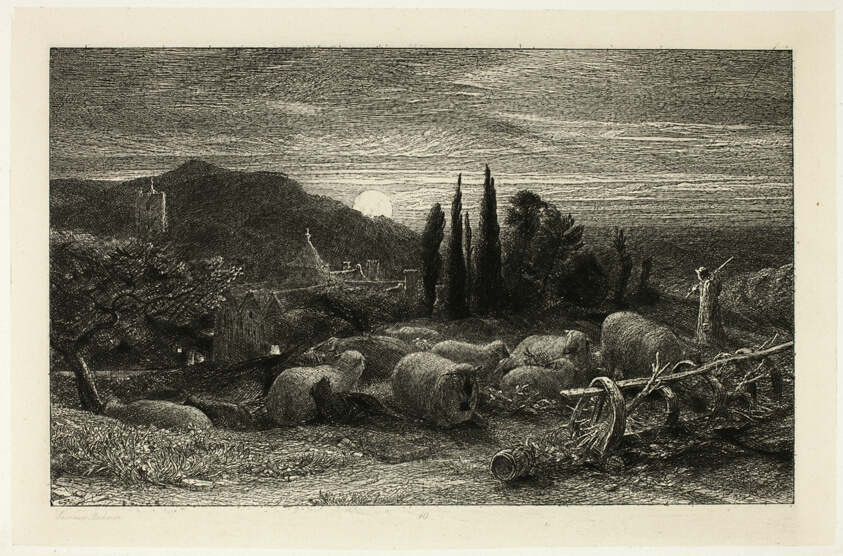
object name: Print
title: The Rising Moon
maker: Samuel Palmer (English, 1805-1881)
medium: Etching in black on paper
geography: England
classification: etching; print; prints and drawing